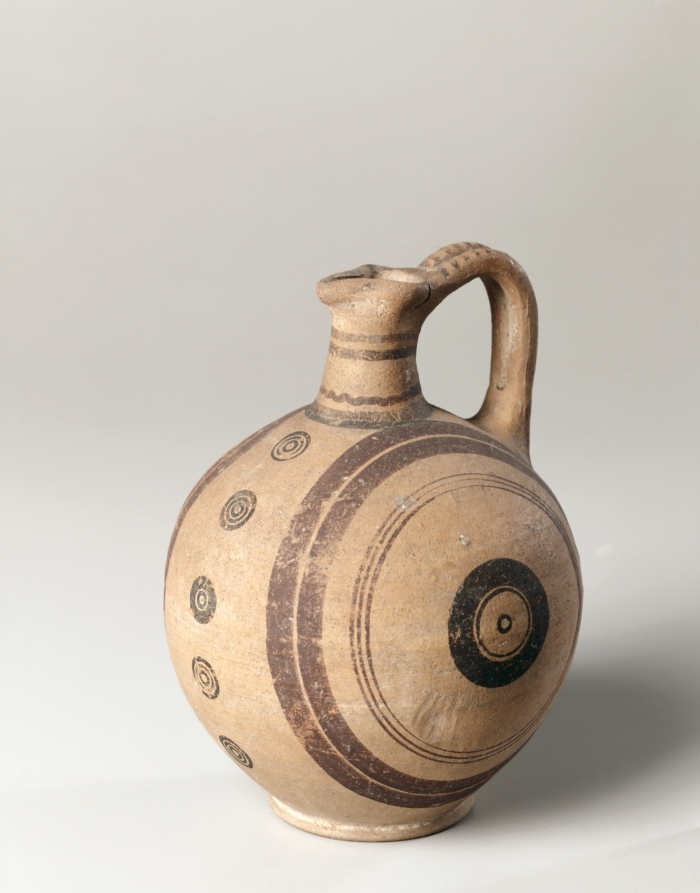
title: Jug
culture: Cyprus, Cypro-Archaic II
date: c. 600–475 BCE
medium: white painted ware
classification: Ceramic